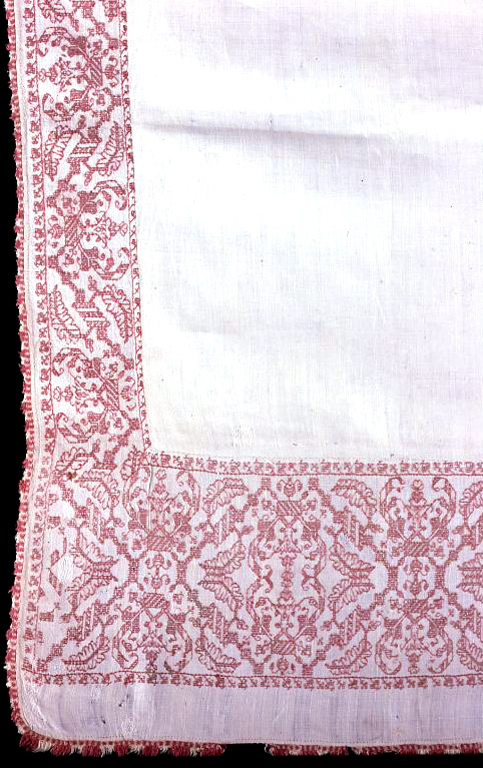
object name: Textile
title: Cover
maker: Italy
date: 17th century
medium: Linen, plain weave; edged with linen, plain weave; embroidered with silk floss in antique hem, back and double running stitches; edged with silk, countered weft twining with extended ground weft cut fringe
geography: Italy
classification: textile; needlework (visual works)